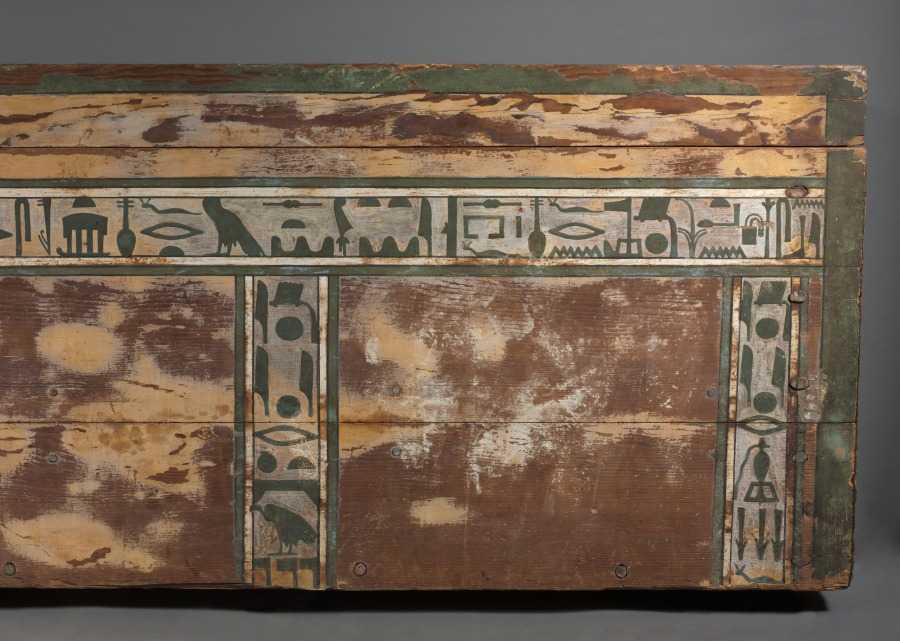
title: Coffin of Senbi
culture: Egypt, Meir, Middle Kingdom, mid-Dynasty 12, reign of Amenemhat II to Sesostris III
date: c. 1918–1859 BCE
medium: gessoed and painted cedar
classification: Funerary Equipment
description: The most common type of coffin during the Middle Kingdom took the shape of a rectangular box with lid. The mummy inside was placed on his left side, facing east, his head behind the two magical eyes. These—in the shape of human eyes, to which have been added the markings of a falcon's head—were supposed to enable him to behold the rising sun, reborn daily. The long horizontal inscriptions are prayers to Anubis (god of embalming) and Osiris (god of the dead) for offerings of food and drink and other items necessary for survival in the afterlife. The short vertical inscriptions place him under the protection of the gods of earth, sky, air, and moisture, as well as various funerary deities.